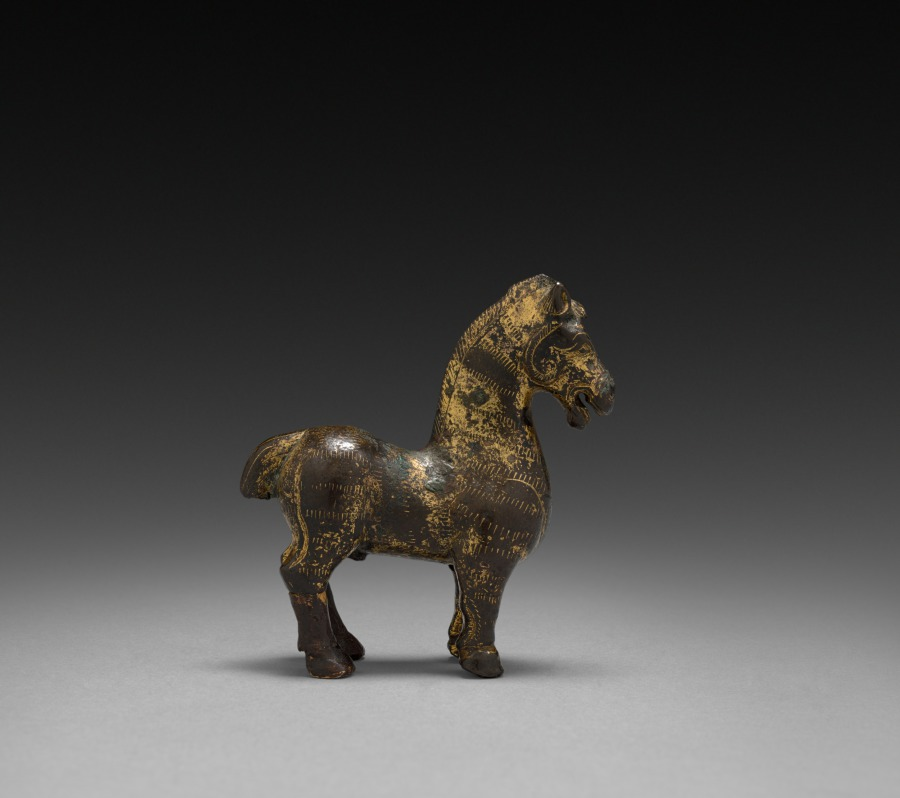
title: Horse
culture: China, Ordos Region, Han dynasty (202 BCE–220 CE)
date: 202 BCE–220 CE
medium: gilt bronze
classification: Sculpture